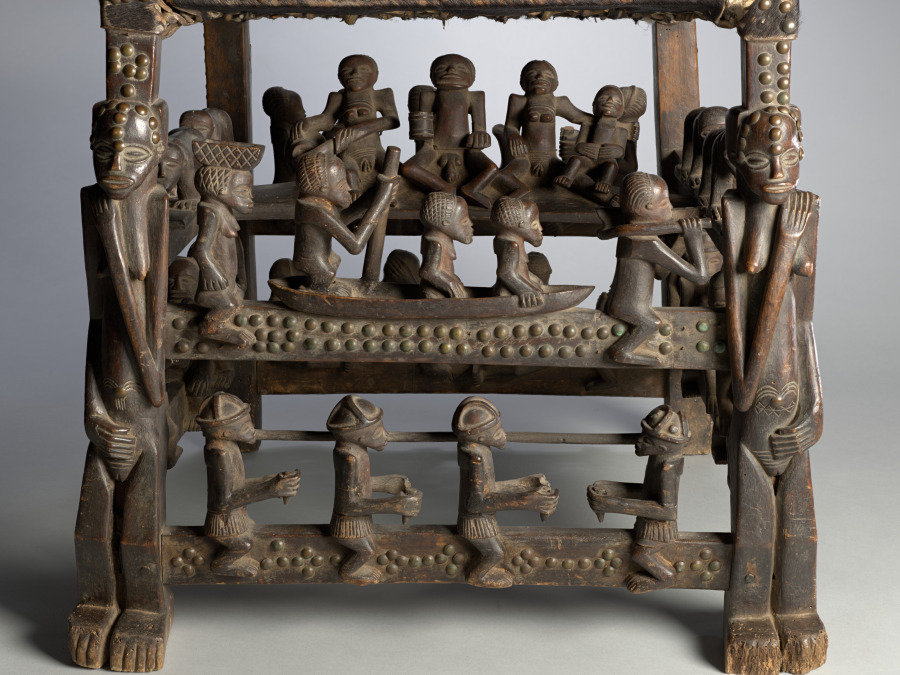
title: Ceremonial Chair or Throne (citwamo ca mangu)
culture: Africa, Central Africa, Angola, Chokwe-style carver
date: 1800s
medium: Wood, upholstery studs, leather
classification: Furniture and woodwork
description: This citwamo ca mangu chair bears over 40 sculpted figures arranged in complex compositions across the chair’s top rail (back), stretchers (rungs), and legs; all symbolize the power of Chokwe supreme chiefs. Such chairs typically bear a dozen or fewer figures. Scenes of royal life and power wrap around the seat, reinforcing how the chief and his family are at the center of their polity and its business.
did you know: Starting around the 1500s, Chokwe and other African leaders and traders received fine chairs as gifts from Portuguese traders. Chokwe leaders adapted this symbol of power as their own, using it in tandem with stools, an earlier kind of prestige seat.